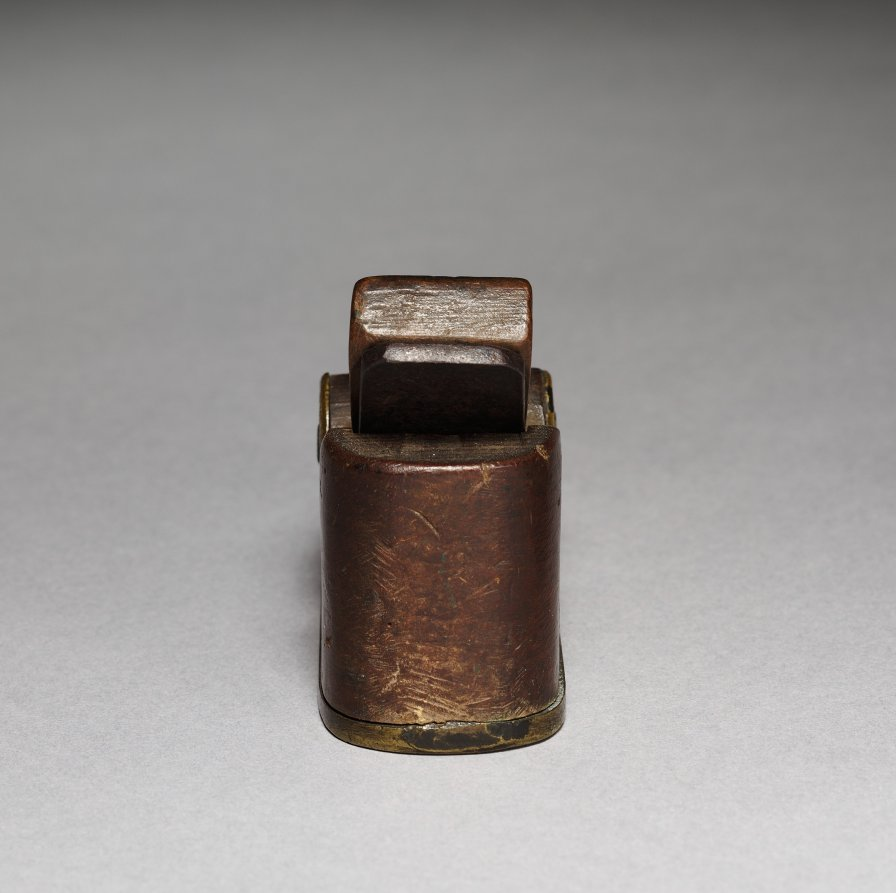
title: Plane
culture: Europe, 18th century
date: 1700s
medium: wood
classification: Tool